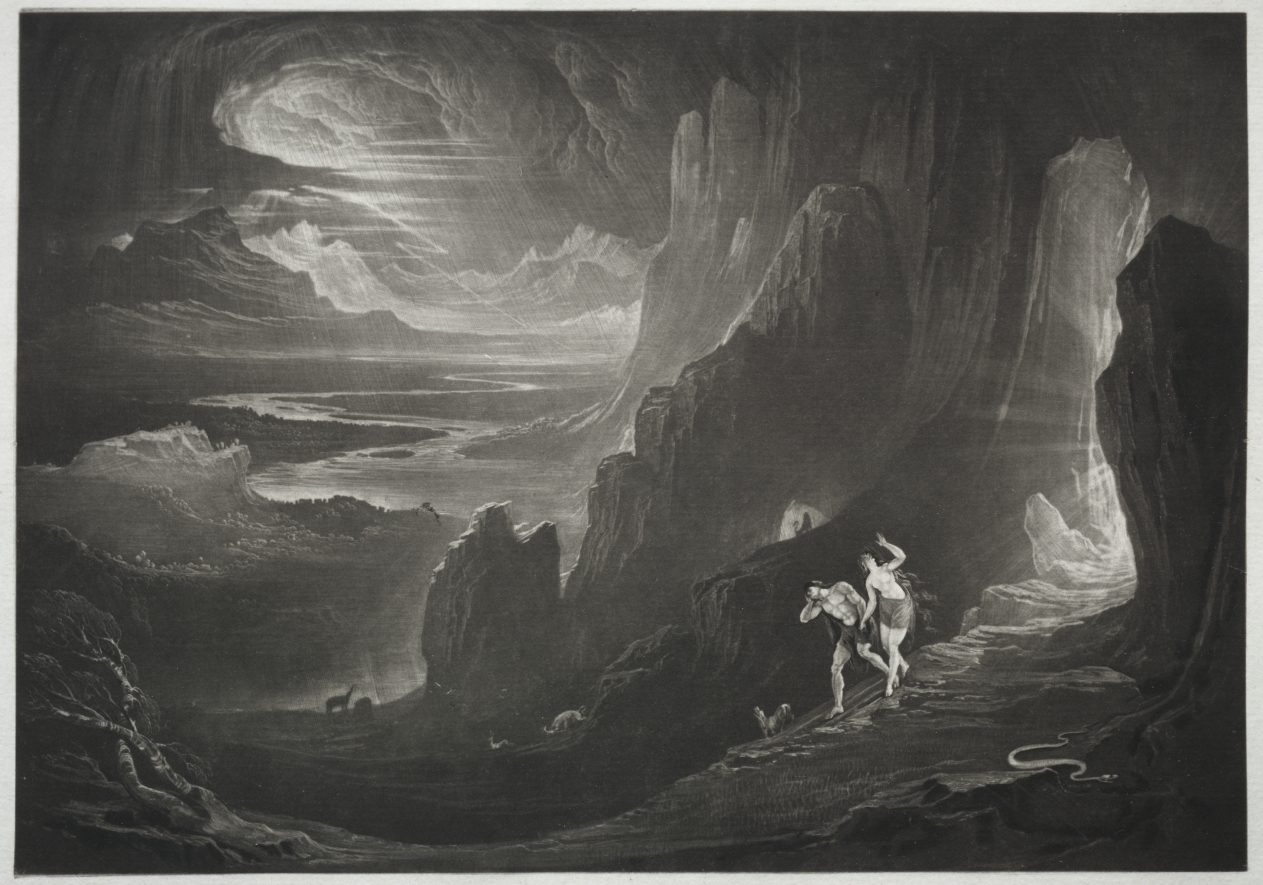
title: Paradise Lost: Adam and Eve Driven out of Paradise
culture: England, 19th century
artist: John Martin (British, 1789–1854)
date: 1824–27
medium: mezzotint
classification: Print